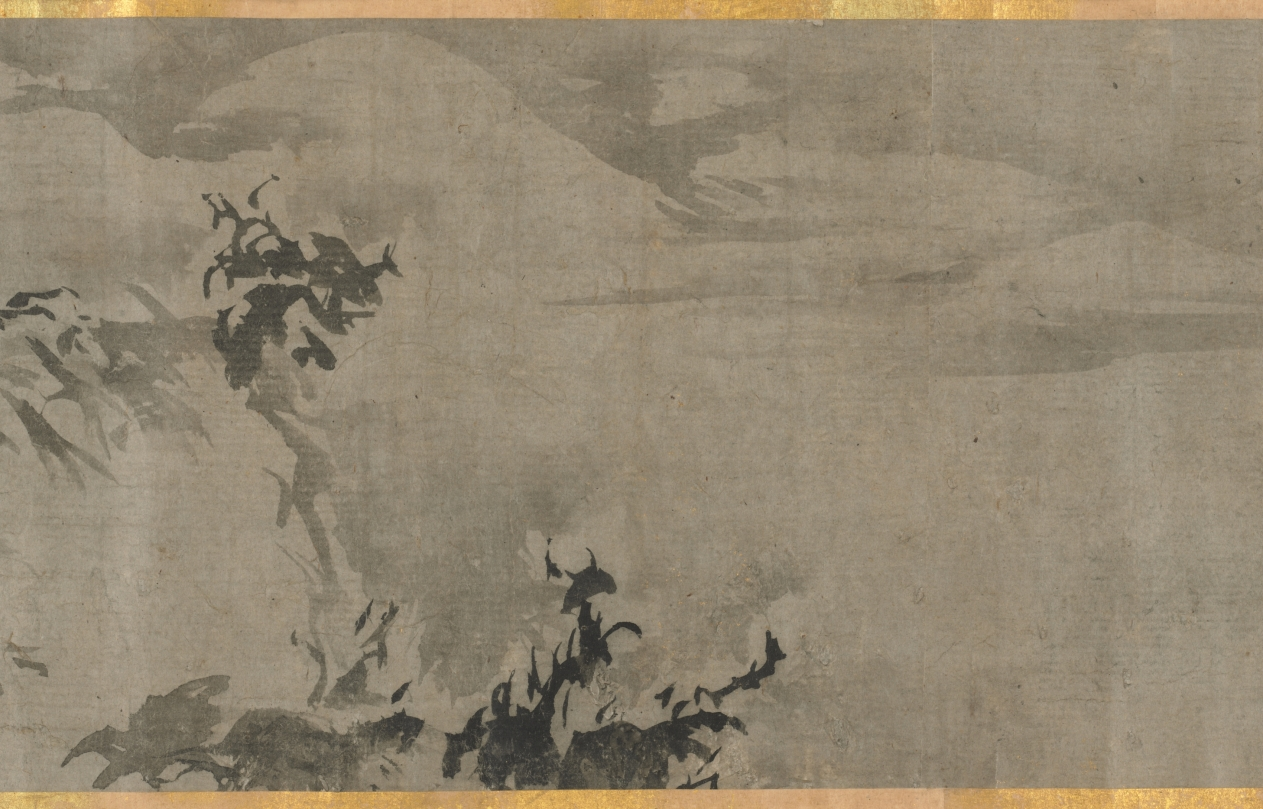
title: Eight Views of Xiao-Xiang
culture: Japan, Muromachi period (1392–1573)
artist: Sesson Shūkei (Japanese, c. 1492–c. 1577)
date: 1500s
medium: handscroll; ink on paper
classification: Painting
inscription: Signature and seal of artist at end of painting.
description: Eight Views of the Xiao and Xiang Rivers can be traced to 11th-century Chinese poems and paintings, the depiction of which had also become popular among Korean and Japanese painters. Xiao-Xiang refers to the region in present-day Hunan province where the Xiao and Xiang rivers converge. Few painters of the Eight Views had in fact seen the scenery; rather, they were trying to portray in ink and wash the lyrical qualities of dim light and a misty atmosphere typical of that region. Each of the poetic titles suggests a time of day, a season, or specific atmospheric conditions—subjects that challenged the abilities of the most talented artists. In this miniature painting (shukuzu) of the Muromachi period, Japanese Zen monk and painter Shukei Sesson depicted all eight views featured in Chinese prototypes: Wild Geese Descending to Sandbar; Returning Sails Off a Distant Coast; Mountain Market in Clearing Mist; River and Sky in Evening Snow; Autumn Moon over Dongting Lake; Night Rain on the Xiao and Xiang; Evening Bell from Mist-Shrouded Temple; and Fishing Village in Evening Glow.